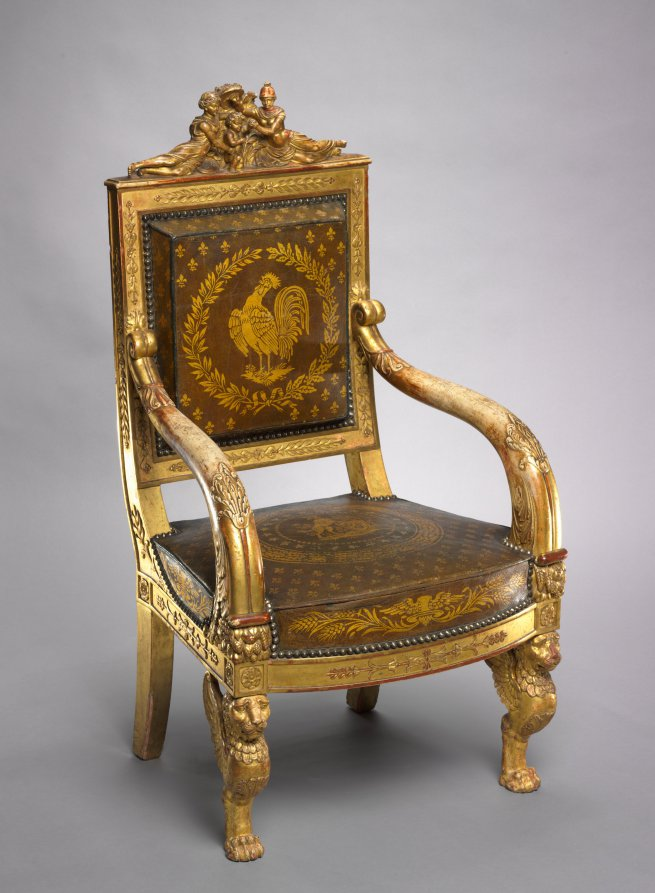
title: Child's Throne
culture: France, Paris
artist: Pierre-Marie Balny le Jeune (French, 1832)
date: 1822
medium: carved and gilded wood, leather upholstery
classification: Furniture and woodwork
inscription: inscribed with stencils inside back rail: BLONDEL TAPISSIER/RUE ST. ANTOINE N 72 1822 inscribed in ink lower edge back rail: 12 JANVIER 18[22?]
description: This chair was made for the young, presumed successor to the French throne who ruled briefly as Henri V in 1830, the last of the direct Bourbon line. He is depicted at the center of the top rail protected by female figures representing France and Minerva, the Roman goddess of wisdom. Fleurs-de-lis and the Gallic rooster, symbols of French royalty and the French people, decorate the upholstery.